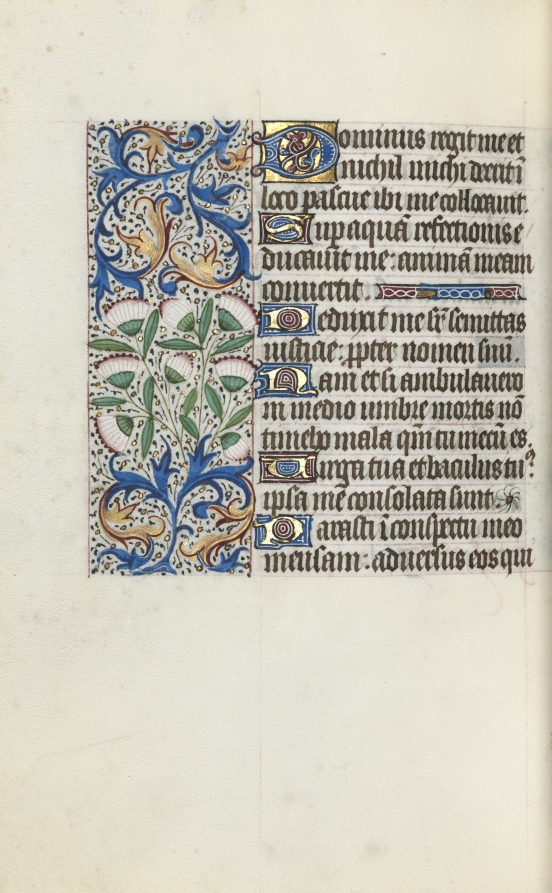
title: Book of Hours (Use of Rouen): fol. 117v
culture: France, Rouen, 15th century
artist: Master of the Geneva Latini (French, active Rouen, 1460–80)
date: c. 1470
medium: ink, tempera, and gold on vellum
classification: Bound Volume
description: In the late 1400s and early 1500s Rouen was an established and important center of book production. The city’s cathedral had a wealthy chapter that spent large sums of money to commission books and to maintain its extensive library. The stationers and booksellers would have likely been concentrated in or near the cathedral precinct. This artist, named after a manuscript now in Geneva, was Rouen’s principal illuminator during the second half of the 1400s.